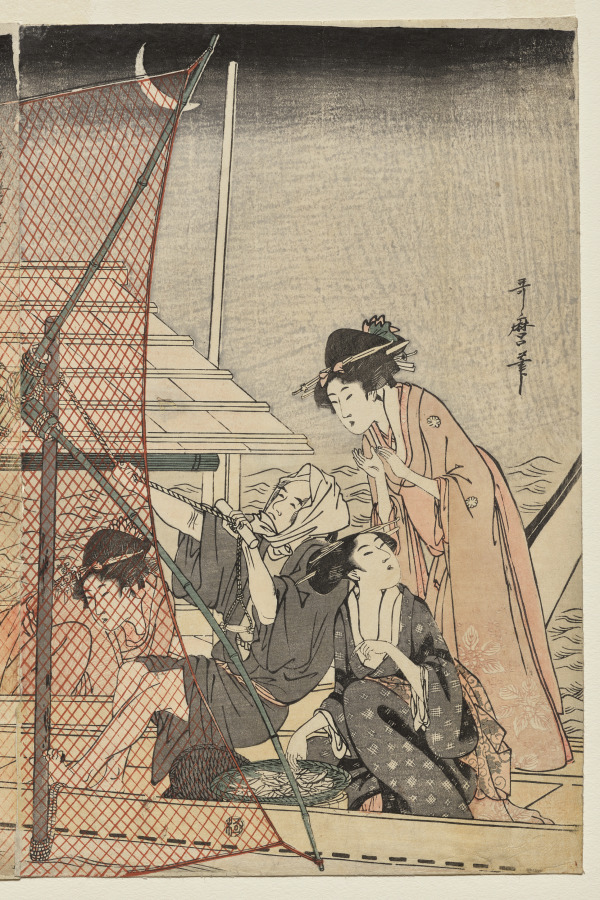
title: Net Fishing at Night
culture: Japan, Edo period (1615–1868)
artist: Kitagawa Utamaro (Japanese, c. 1754–1806)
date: c. 1800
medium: One of a triptych of color woodblock prints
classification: Print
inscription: Signature: Utamaro hitsu Censorship Seal: kiwame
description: Pleasure-boating in the evening on the Sumida River to escape the summer’s heat was about as popular as viewing cherry blossoms in spring for Edo townspeople. The river also led the way to the Yoshiwara, the licensed brothel district. A boating party with courtesans and gentlemen jostles up next to a fishing boat. Utamaro enjoyed portraying a scene through the design of a fishing or mosquito net. The different colors of the net suggest these impressions may be from two different series.